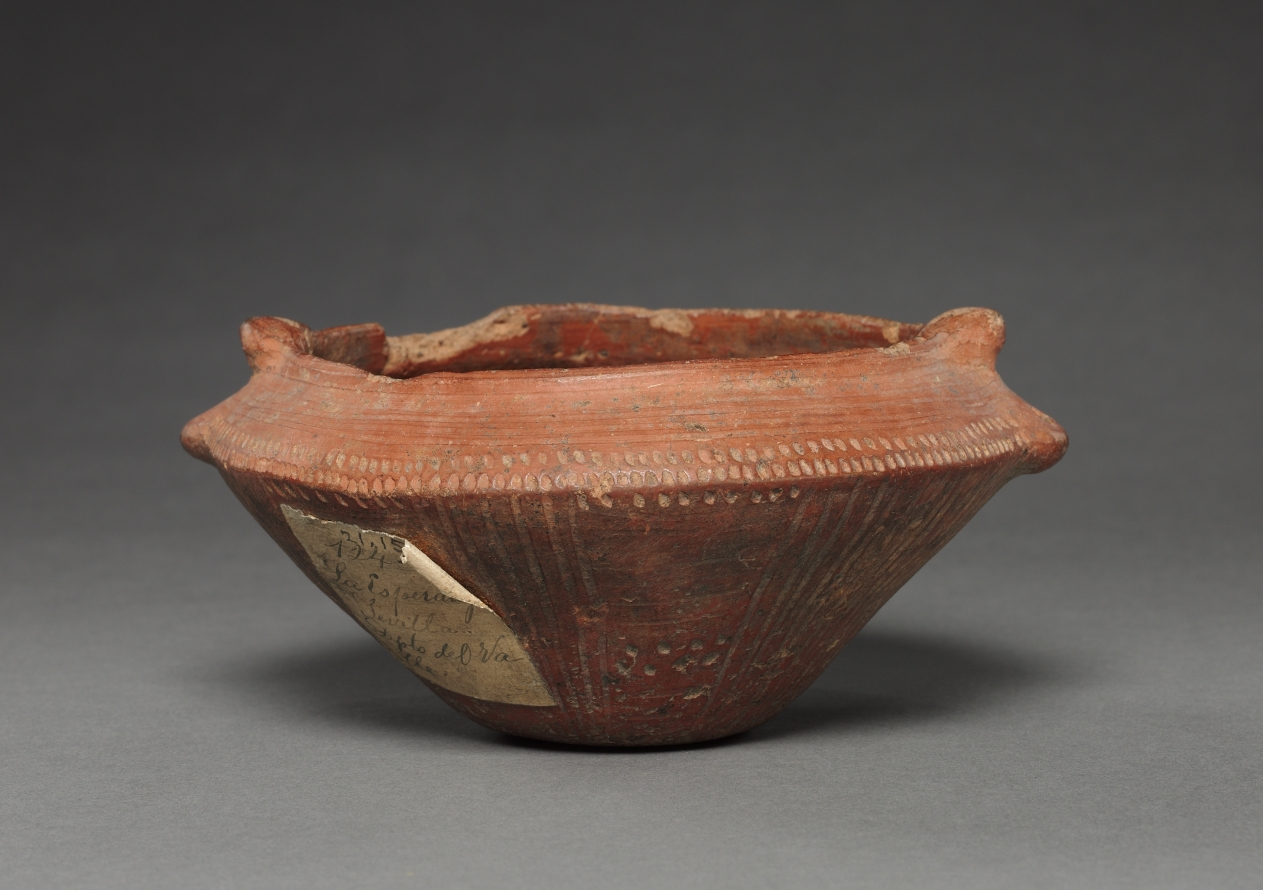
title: Dish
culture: Colombia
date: before 1550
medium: red ware with incised patterns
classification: Ceramic